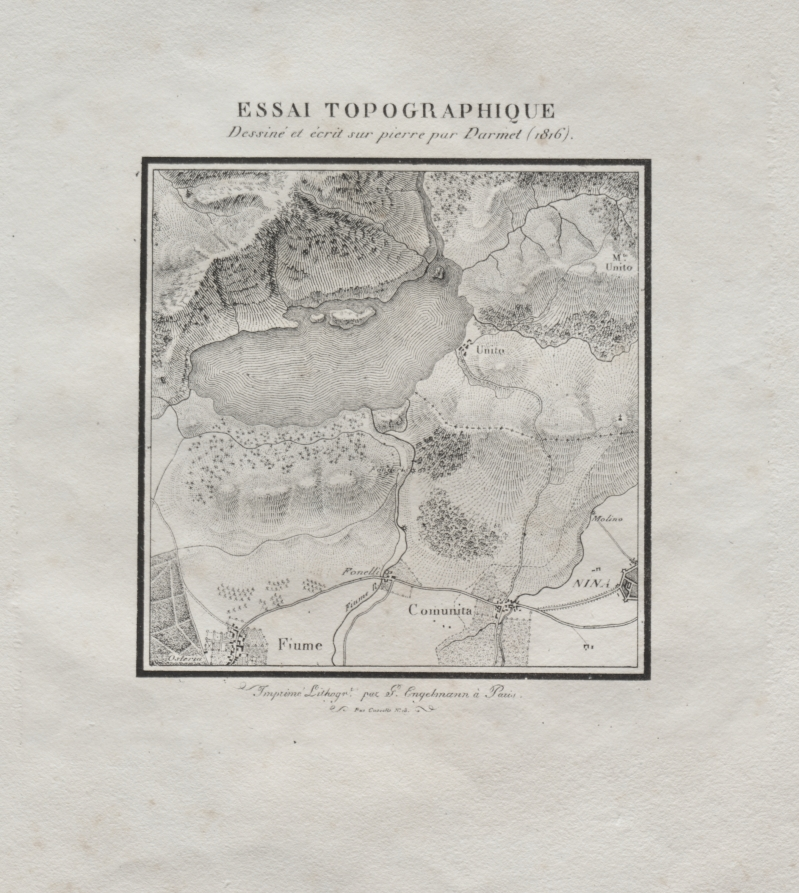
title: Receuil d'essais lithographiques: Essai topographique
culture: France, 19th century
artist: Darmet (French)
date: 1816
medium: lithograph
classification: Bound Volume